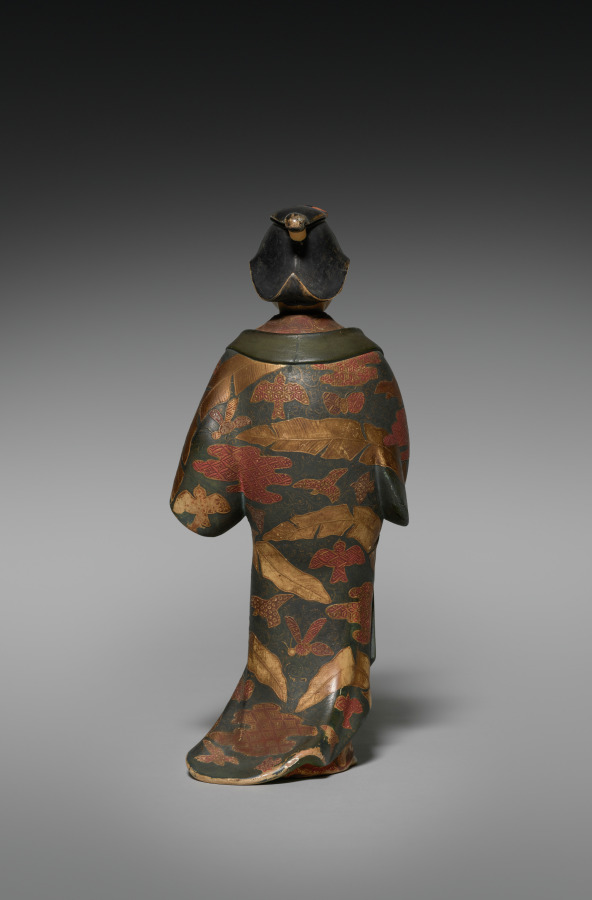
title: Saga Doll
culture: Japan, Edo period (1615–1868)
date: 1688–1703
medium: lacquered wood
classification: Sculpture